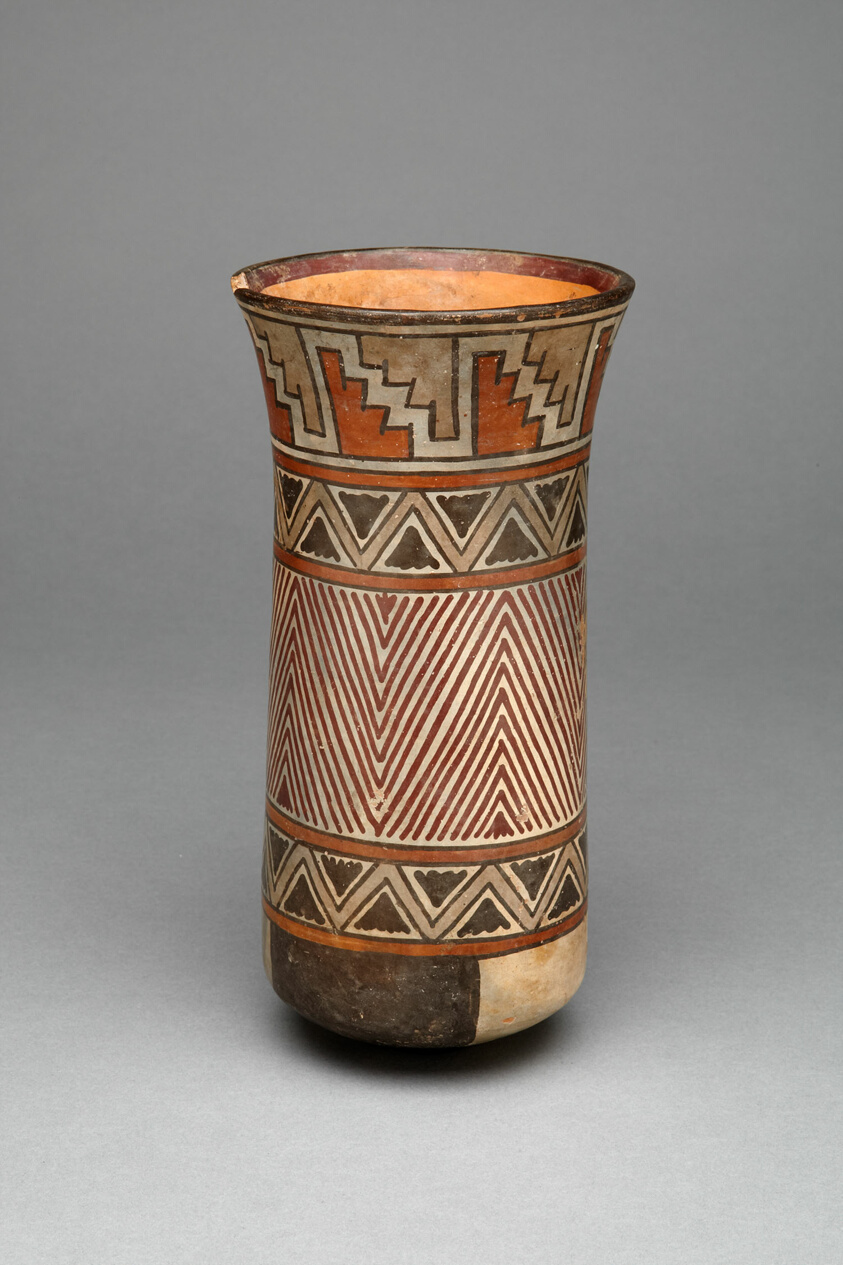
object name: Vessel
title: Beaker with Geometric Textile Pattern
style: nazca, early intermediate period, Pre-Columbian, americas, Arts of the Americas, andean, andes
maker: Nazca; South coast, Peru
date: 180 BCE–500 CE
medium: Ceramic and pigment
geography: Nazca Valley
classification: earthenware; art of the americas; ceramics; vessel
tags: super/natural